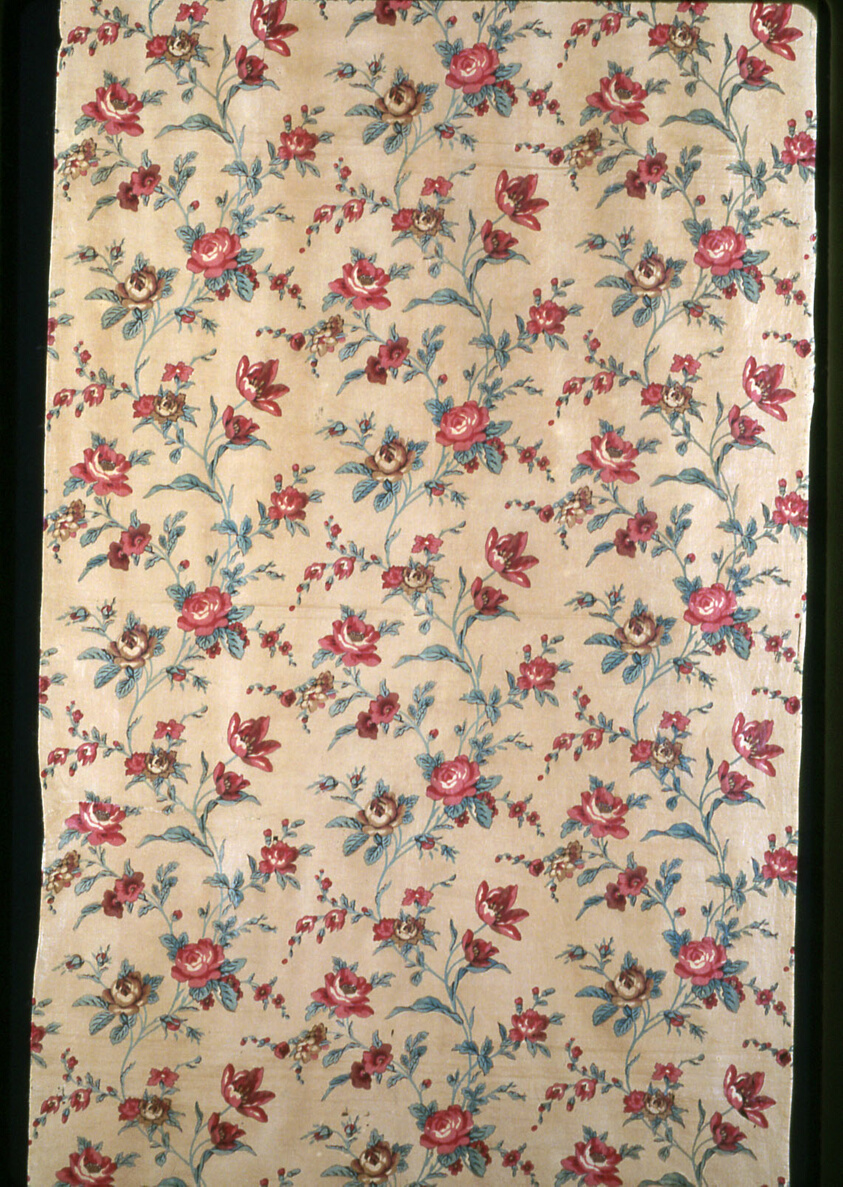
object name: Textile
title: Panel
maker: England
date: c. 1830/40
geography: England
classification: textile; weaving - printed; weaving